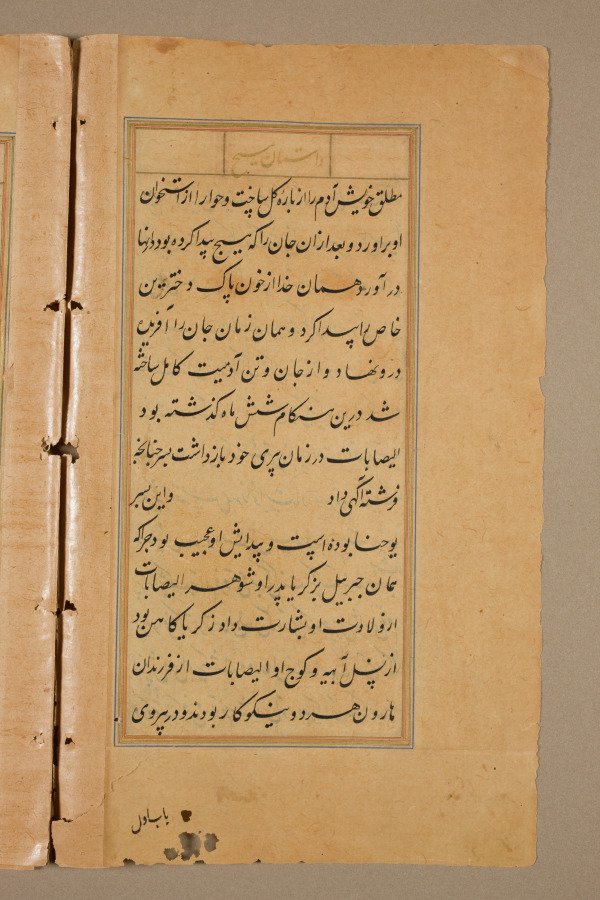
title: Text, folio 17 (verso), from a Mirror of Holiness (Mir’at al-quds) of Father Jerome Xavier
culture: Mughal India, Allahabad, made for Prince Salim (1569–1627)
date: 1602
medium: Ink and gold on paper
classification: Manuscript